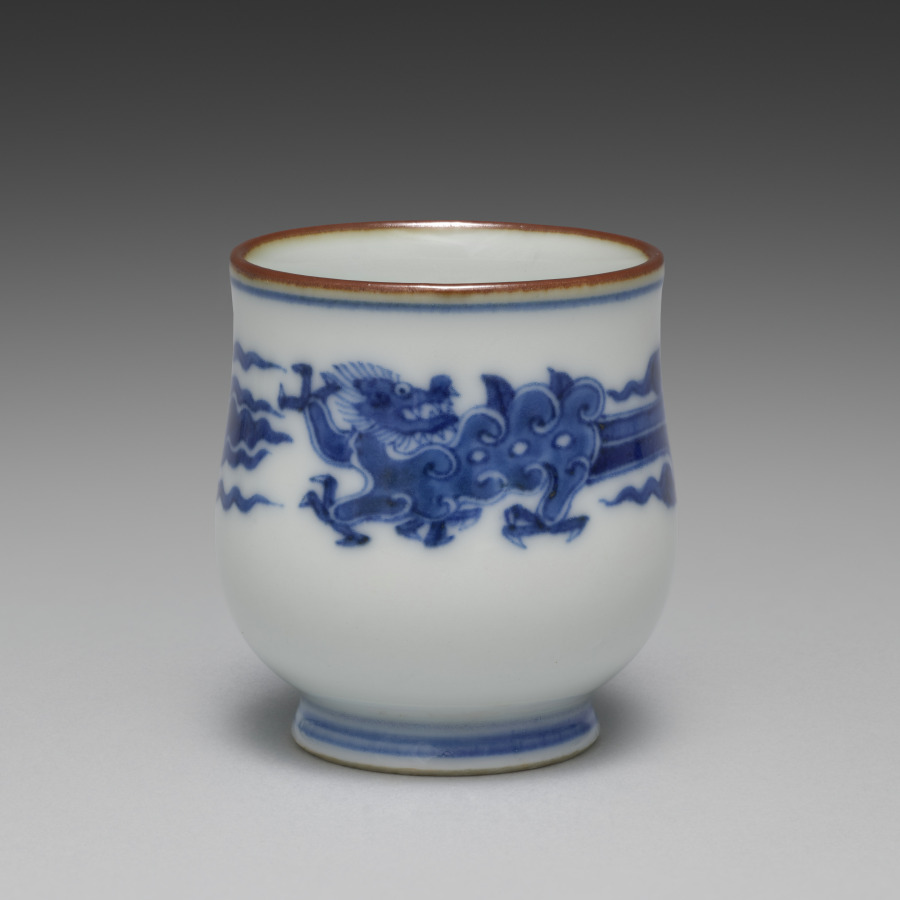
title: Cup from Sake Cups with Dragons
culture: Japan, Meiji period (1868–1912)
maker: Seifū Yohei III (Japanese, 1851–1914)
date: c. 1893–1914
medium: One from a set of six sake cups; porcelain with underglaze blue and iron oxide rims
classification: Ceramic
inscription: 大日本清風造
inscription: 清風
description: Each of these sake cups pictures two backward-looking dragons. The highly stylized creatures resemble jade carvings.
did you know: Seifū Yohei III was inspired by the Chinese mythical animals that were common on porcelain objects made at Jingdezhen in China during the Ming dynasty (1368–1644) and then exported around the world.